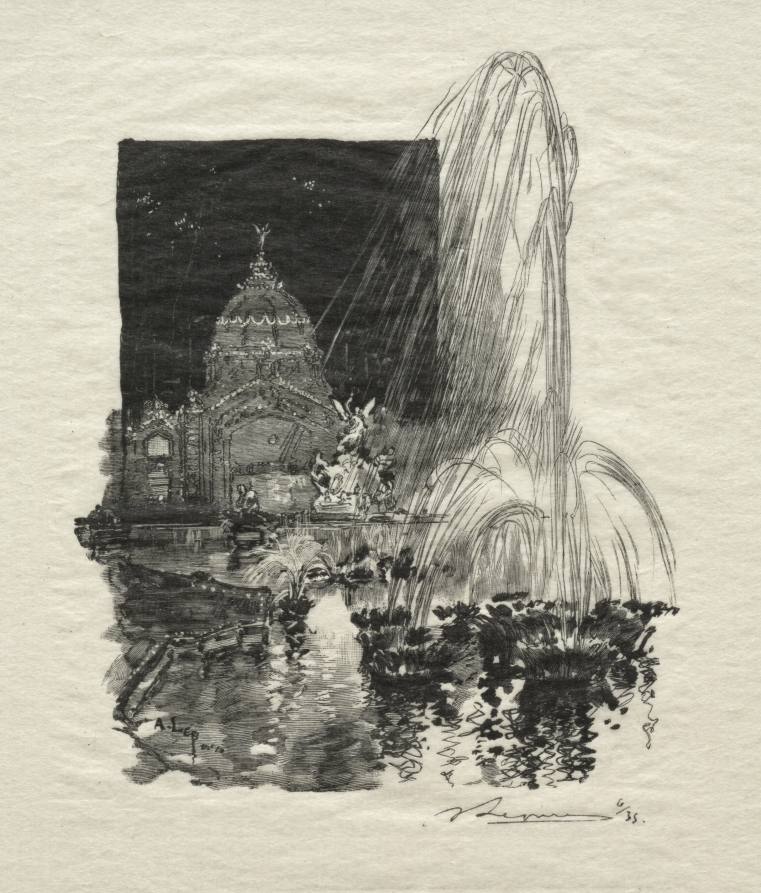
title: Fontaines Lumineuses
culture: France, 19th-20th century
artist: Auguste Louis Lepère (French, 1849–1918)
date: 1889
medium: wood engraving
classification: Print